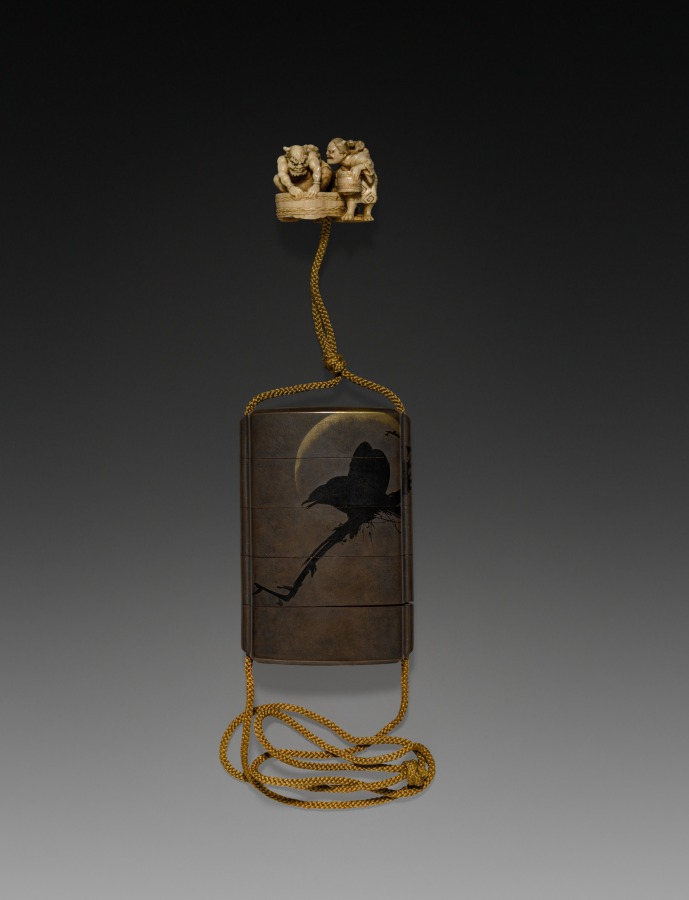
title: Netsuke with Demon Bathing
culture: Japan, Meiji period (1868–1912)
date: c. 1890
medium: ivory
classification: Netsuke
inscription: Signed: 玉秀